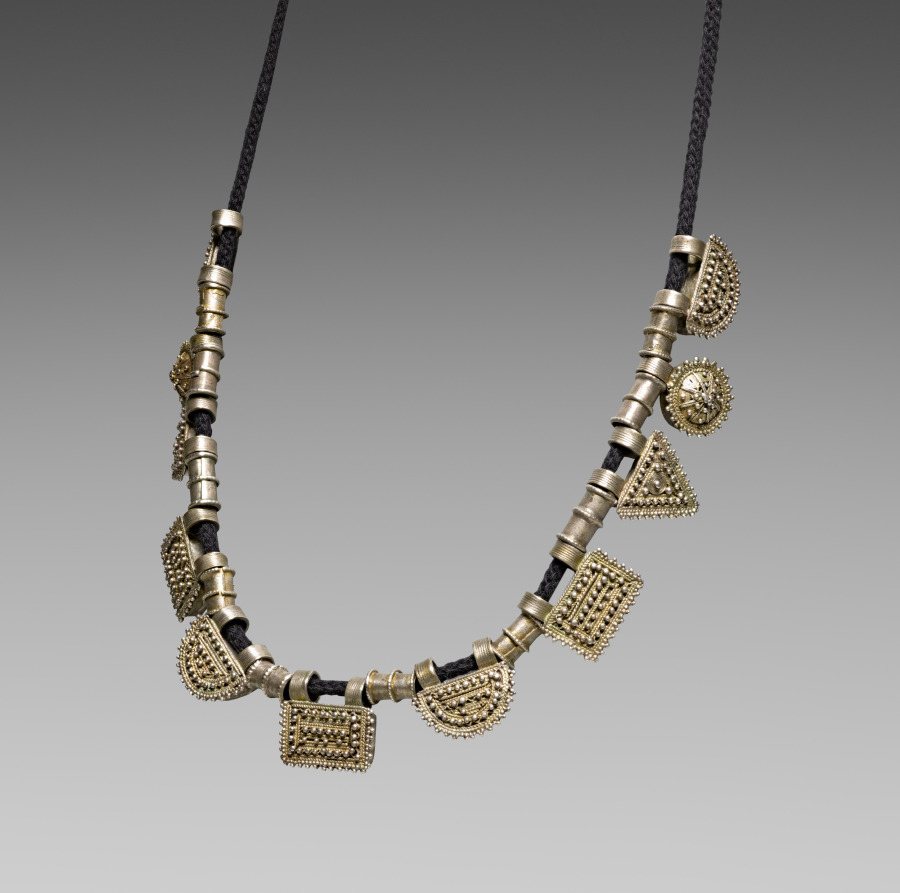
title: Necklace (ashän ketab) with amulet pendants (tälsäm)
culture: Africa, East Africa, Ethiopia, unknown silversmith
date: late 1800s or early 1900s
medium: silver alloy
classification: Jewelry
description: Ornate filigree jewelry was historically made in Ethiopia for royals and nobility by specialized silversmiths trained through long apprenticeships. This silver necklace is composed of numerous box-shaped amulet pendants (tälsäm) meant to ward off the evil eye or other dangers. Linked to Islamic amuletic practices, the boxes are effective whether empty or whether they contain magical or prayerful texts. Their fine filigree and granulation work is characteristic of Harar as well as the Ethiopian Orthodox Christian city of Aksum.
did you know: Ethiopian silver jewelry is made by melting high-purity Maria Theresa thaler coins made from the 1700s to the 1900s.